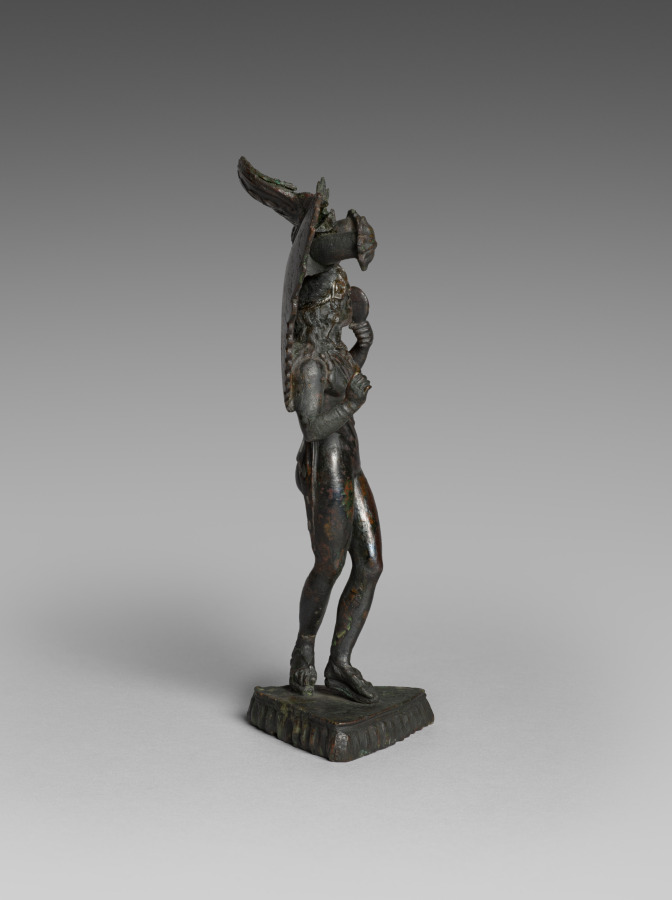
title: Patera Support: Lasa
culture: Etruscan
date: 300–175 BCE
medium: bronze with silver inlays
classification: Sculpture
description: Standing on a triangular base, this winged female figure twists her body while admiring herself in the small mirror held in her left hand. Nearly nude, she wears sandals as well as a leopard or panther skin and jewelry inlaid with silver. Above her head and wings, a small portion of a patera, or shallow offering dish, survives. Inscriptions identify similar winged female figures elsewhere in Etruscan art as Lasas, often together with Turan (an Etruscan goddess analogous to the Greek Aphrodite).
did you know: This elaborate figure served as a handle or support for a patera, a shallow dish.